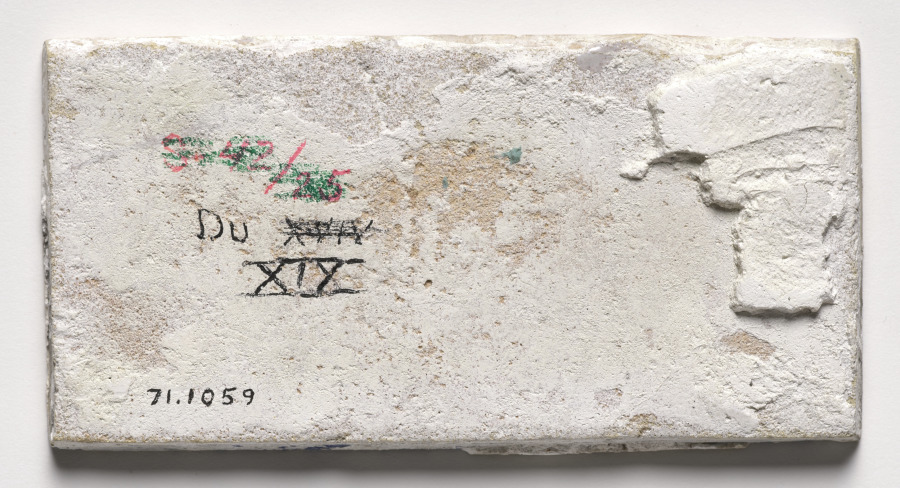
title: Tile–Border Tile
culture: Netherlands, Holland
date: c. 1888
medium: glazed ceramic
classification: Ceramic